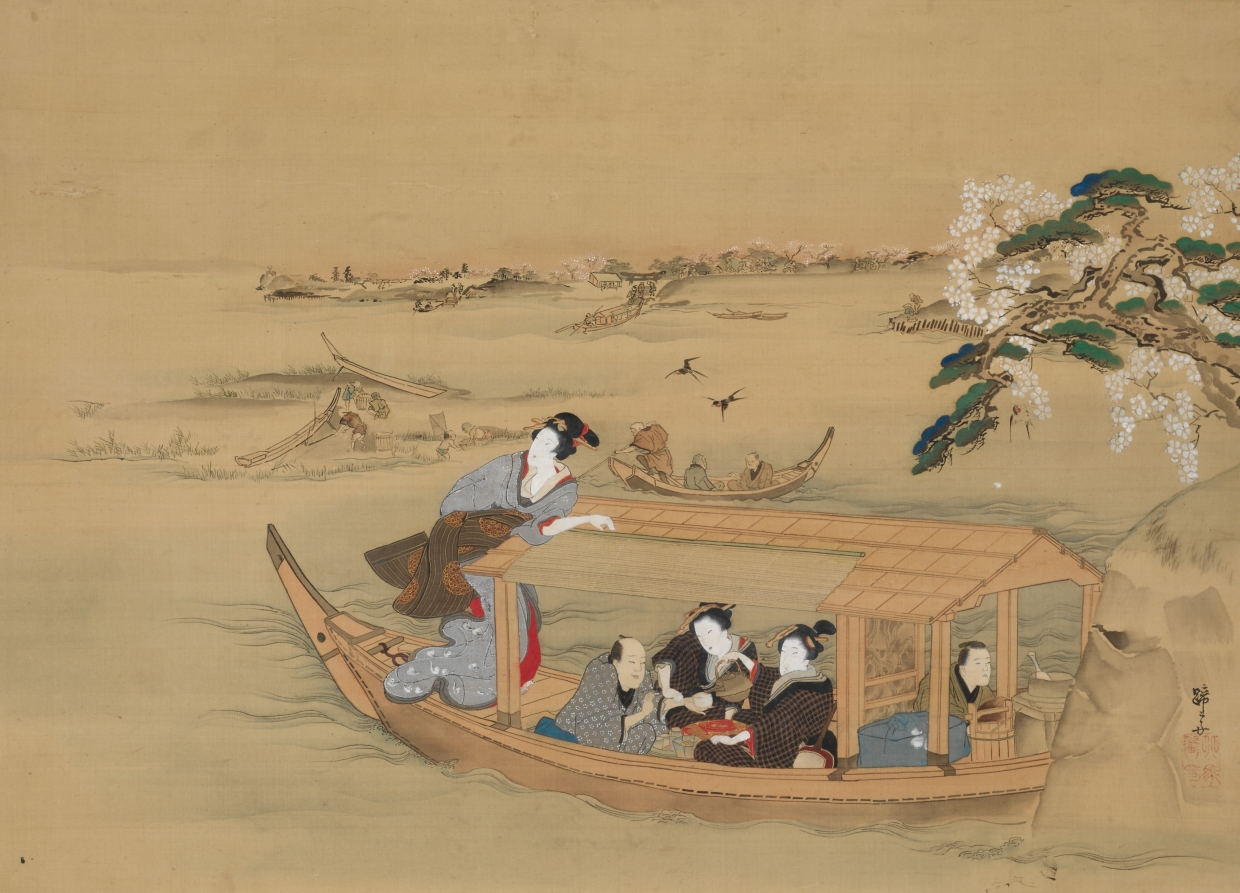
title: Pleasure Boat on the Sumida River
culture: Japan, Edo period (1615–1868)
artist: Teisai Hokuba (Japanese, 1771–1844)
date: 1800s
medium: Hanging scroll; ink and color on silk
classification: Painting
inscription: Signed: Teisai. Sealed: Teisai go [no] in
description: After a major fire in Edo (now Tokyo), the Yoshiwara licensed brothel district was relocated to an area accessed via boat along the Sumida River, giving rise to many compositions depicting travel there. Here, attendants with checkered robes serve refreshment to a client. A figure at the fore of the boat tends to the kitchen. A courtesan at the aft, or rear, surveys the river scene. Acquaintances converse in modest commuter boats, and fishers put in to a tiny island. The boat is near the entrance to the San’ya Canal, where pleasure-seekers would disembark.